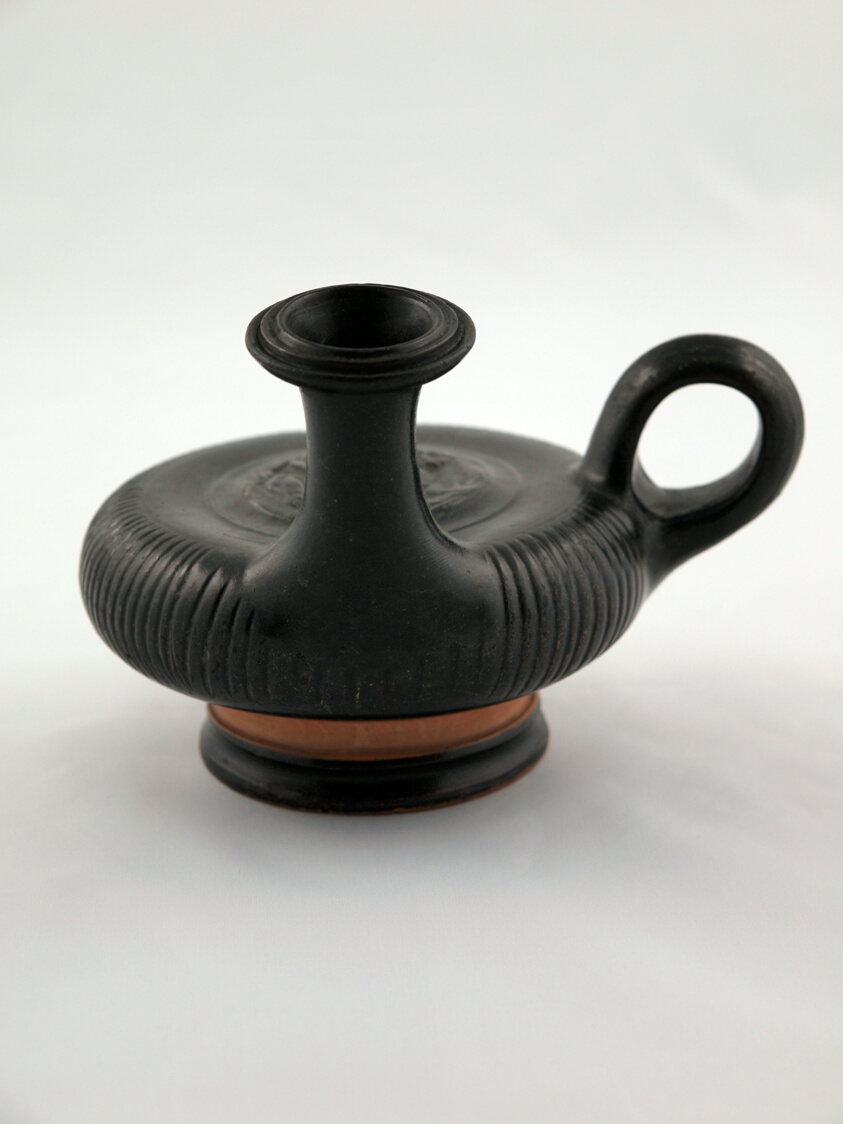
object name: Vessel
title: Guttus (Pouring Vessel)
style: greek, ancient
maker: Greek; Apulia, Italy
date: 330-300 BCE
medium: terracotta, black-glaze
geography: Cales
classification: ceramics; vessel; ancient art